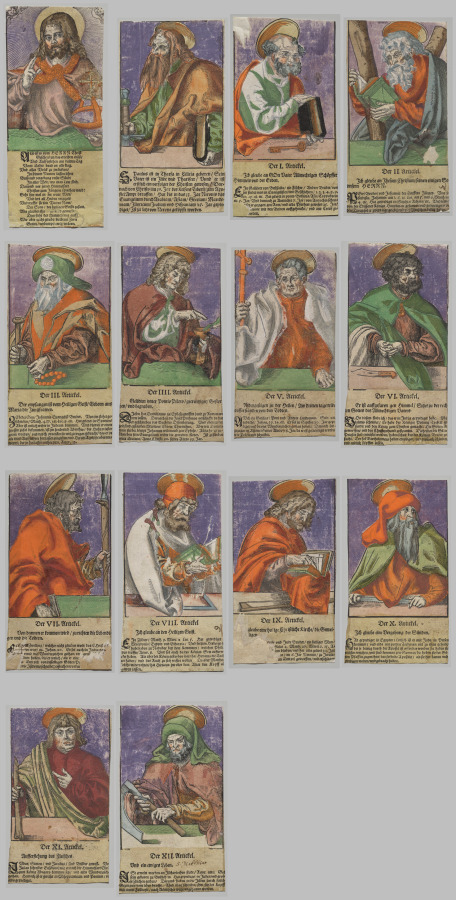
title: Christ, the Twelve Apostles, and Saint Paul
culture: Germany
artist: Lucas Cranach the Elder, After (German, 1472–1553)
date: 1563/64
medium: Set of 14 woodcuts colored by hand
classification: Print